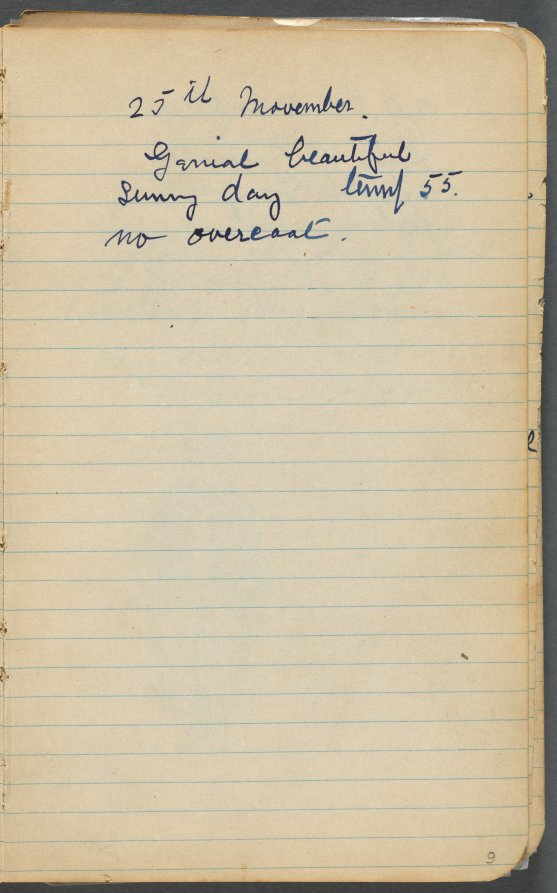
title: Sketchbook, page 009: Notes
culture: America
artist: Maurice Prendergast (American, born Newfoundland [now Canada], 1858–1924)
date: 1905–10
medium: graphite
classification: Bound Volume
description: This sketchbook contains 69 pages of drawings, a diary largely devoted to the state of the artist's health, and a three-page discourse on the nature of genius and ideas.